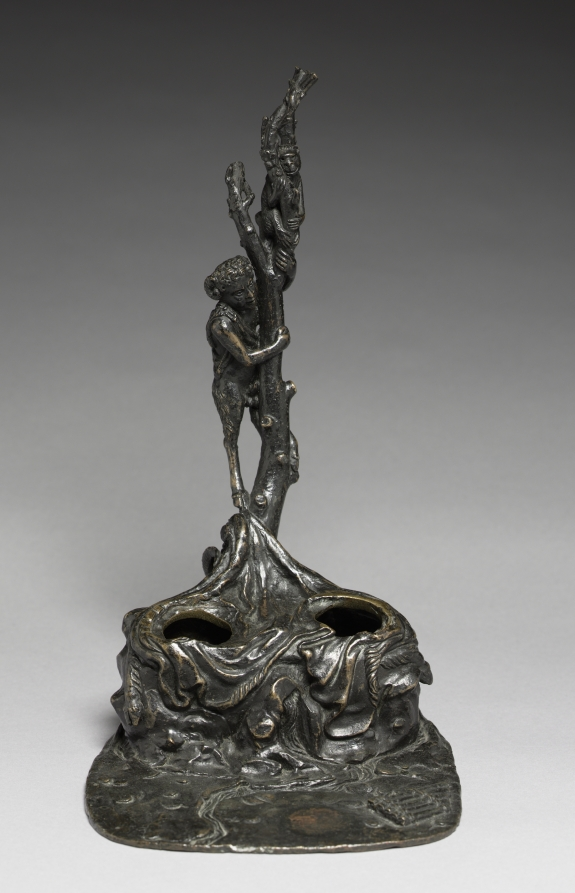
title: Base for a Satyr and Satyress Group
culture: Italy, possibly Padua, early 16th century or later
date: early 1500s or later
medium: bronze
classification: Sculpture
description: The pagan subject matter here was common in the 1500s and, with the pan pipes on the ground, indicates a scene of poetry and music. Long thought to be an ink stand, the two openings are now understood as possibly having housed a satyr and satyress.